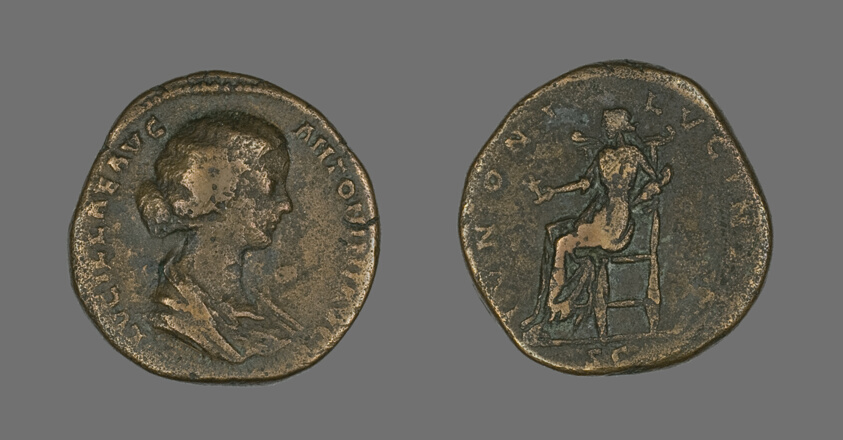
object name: Coin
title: Coin Portraying Empress Lucilla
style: imperial (roman), ancient, roman (ancient, style or period)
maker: Roman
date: 164-169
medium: Bronze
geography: Roman Empire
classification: coin; struck; ancient art